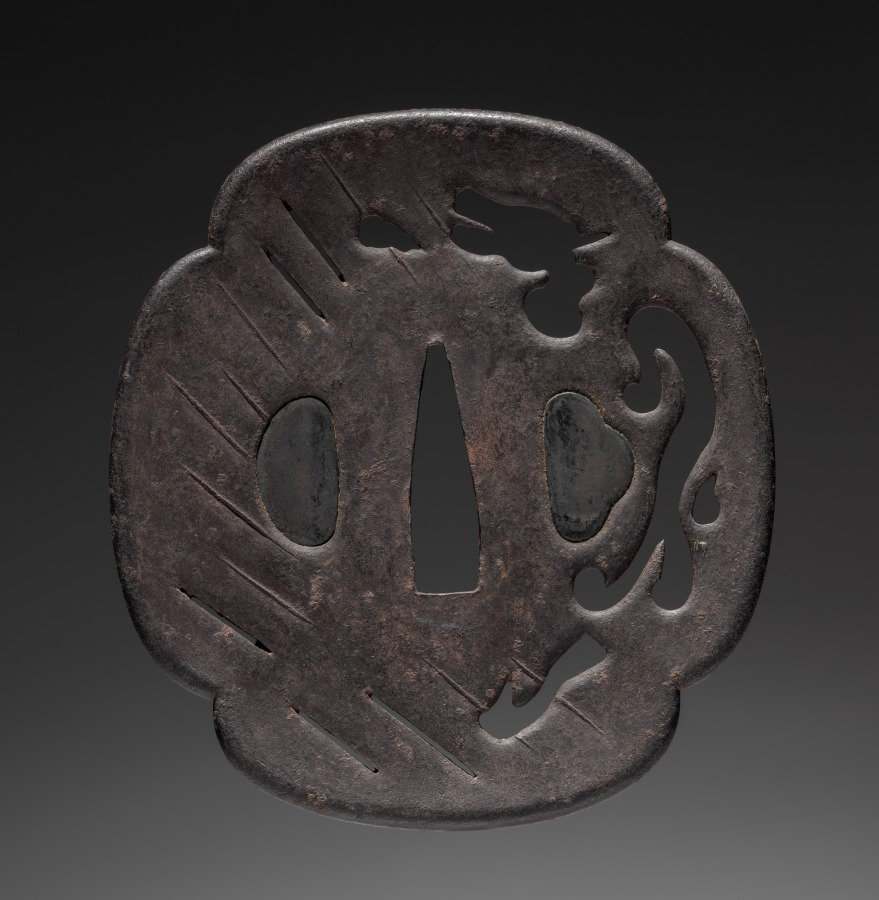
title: Sword Guard (Tsuba)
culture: Japan, possibly Edo period (1615-1868)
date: c. 1615–1868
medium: iron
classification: Arms and Armor